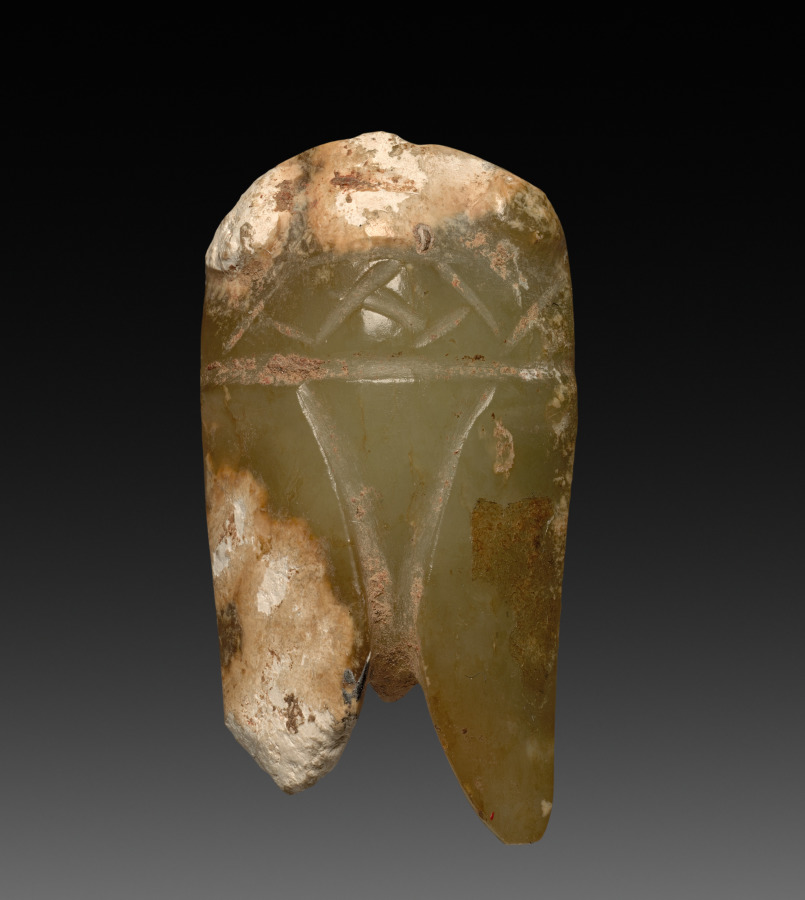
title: Cicada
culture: China, Zhou dynasty (c. 1046–256 BCE)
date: 1100–1000 BCE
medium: jade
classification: Jade